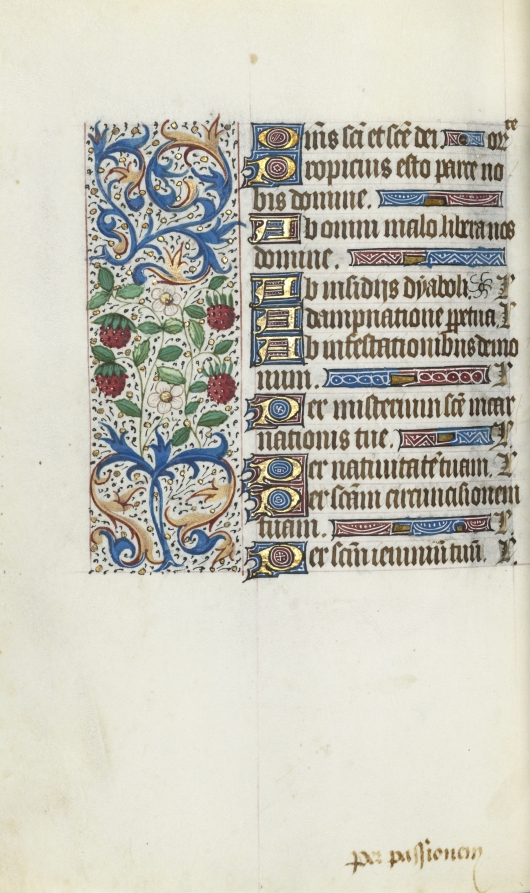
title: Book of Hours (Use of Rouen): fol. 94v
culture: France, Rouen, 15th century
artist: Master of the Geneva Latini (French, active Rouen, 1460–80)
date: c. 1470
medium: ink, tempera, and gold on vellum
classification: Bound Volume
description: In the late 1400s and early 1500s Rouen was an established and important center of book production. The city’s cathedral had a wealthy chapter that spent large sums of money to commission books and to maintain its extensive library. The stationers and booksellers would have likely been concentrated in or near the cathedral precinct. This artist, named after a manuscript now in Geneva, was Rouen’s principal illuminator during the second half of the 1400s.